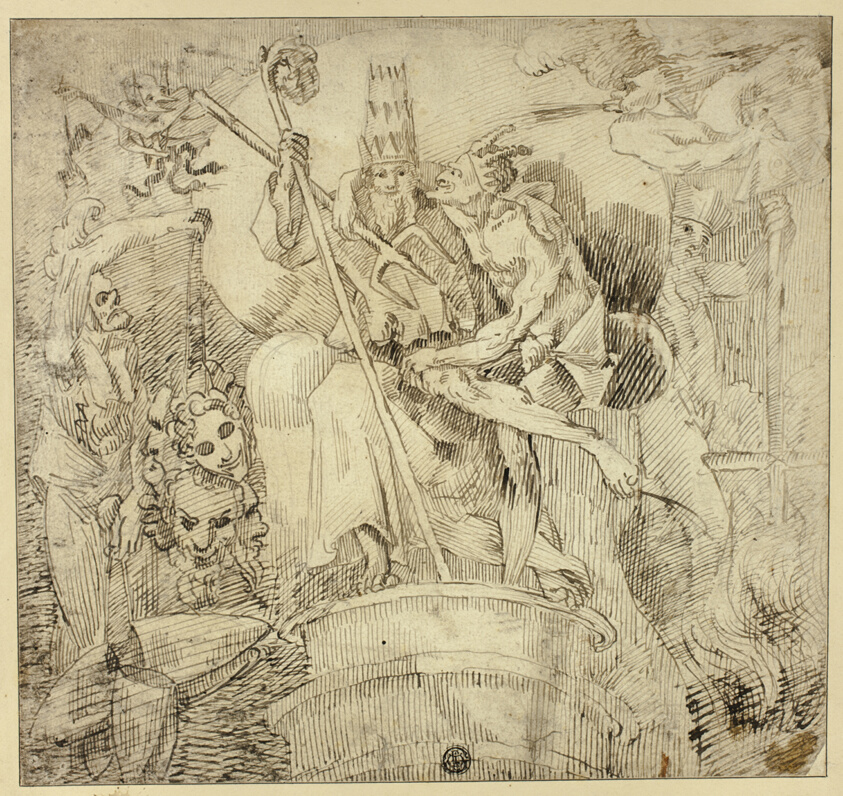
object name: Drawing and Watercolor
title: Pope Embraced by Devil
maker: Style of John Hamilton Mortimer (English, 1740-1779)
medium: Pen and brown ink, over graphite, on grayish-cream laid paper, laid down on cream wove paper, perimeter mounted on tan wove paper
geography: England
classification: pen and ink drawings; drawings (visual works); prints and drawing